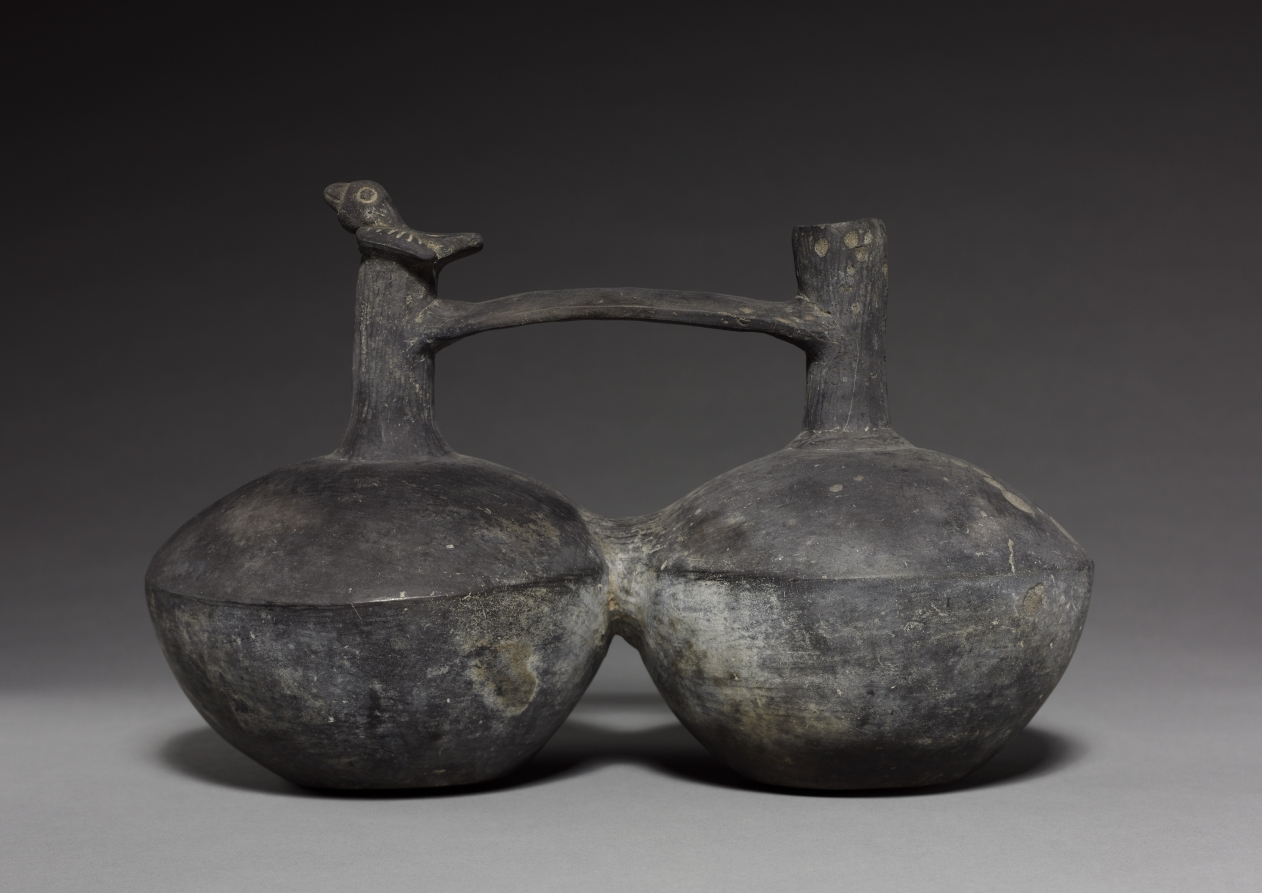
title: Bottle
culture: Peru, Chimú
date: 1300–1400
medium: pottery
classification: Ceramic